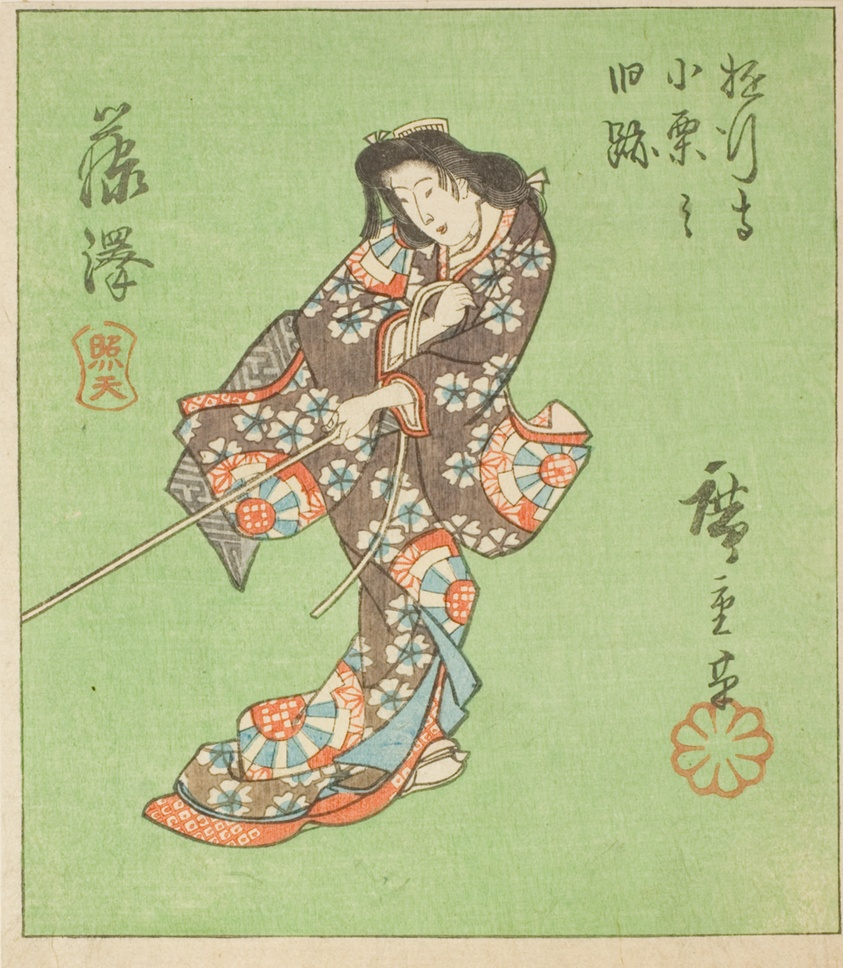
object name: Print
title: Fujisawa, section of sheet no. 2 from the series "Cutout Pictures of the Tokaido (Tokaido harimaze zue)"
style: Japanese (culture or style)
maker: Utagawa Hiroshige 歌川 広重; Japanese, 1797-1858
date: c. 1848/52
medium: Color woodblock print; section of harimaze sheet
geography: Japan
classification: woodblock print; print; asian art